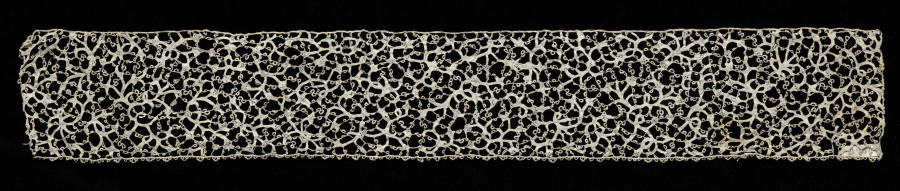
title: Lace Edging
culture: Italy, Venice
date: 1660–99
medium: Needle lace (Coralline Point) edging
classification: Lace